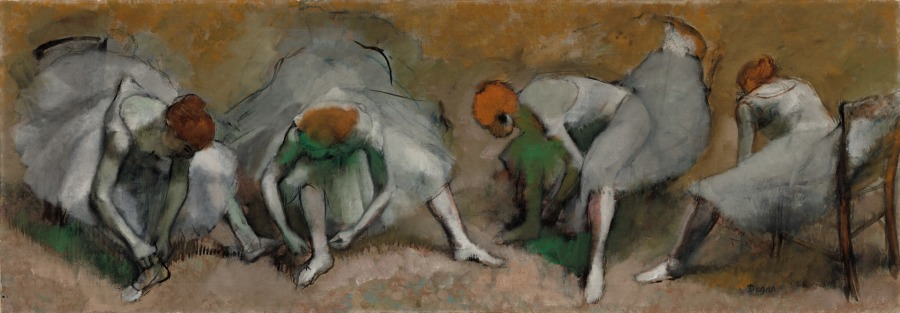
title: Frieze of Dancers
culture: France, 19th century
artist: Edgar Degas (French, 1834–1917)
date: c. 1895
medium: oil on fabric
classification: Painting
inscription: Signed in lower right: Degas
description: This painting may depict a single dancer seen from four different viewpoints. The young woman is placed in an undefined setting, surrounded by mere wisps of color, applied so spontaneously that the paint ran and dripped. Degas even added the circles in the foreground with his thumb. Such audacity, while acceptable in a small sketch, must have shocked the artist's contemporaries when presented on a six-foot canvas. Equally radical is the idea of combining multiple views of a single figure. Degas's unusual presentation may have been inspired by the photographs of Eadweard Muybridge (1830-1904)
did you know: The ballet is a subject Degas returned to again and again over the course of his career. Rather than public performances, he often depicted dancers behind the curtain, practicing, waiting, or, as in this painting, lacing up their shoes.